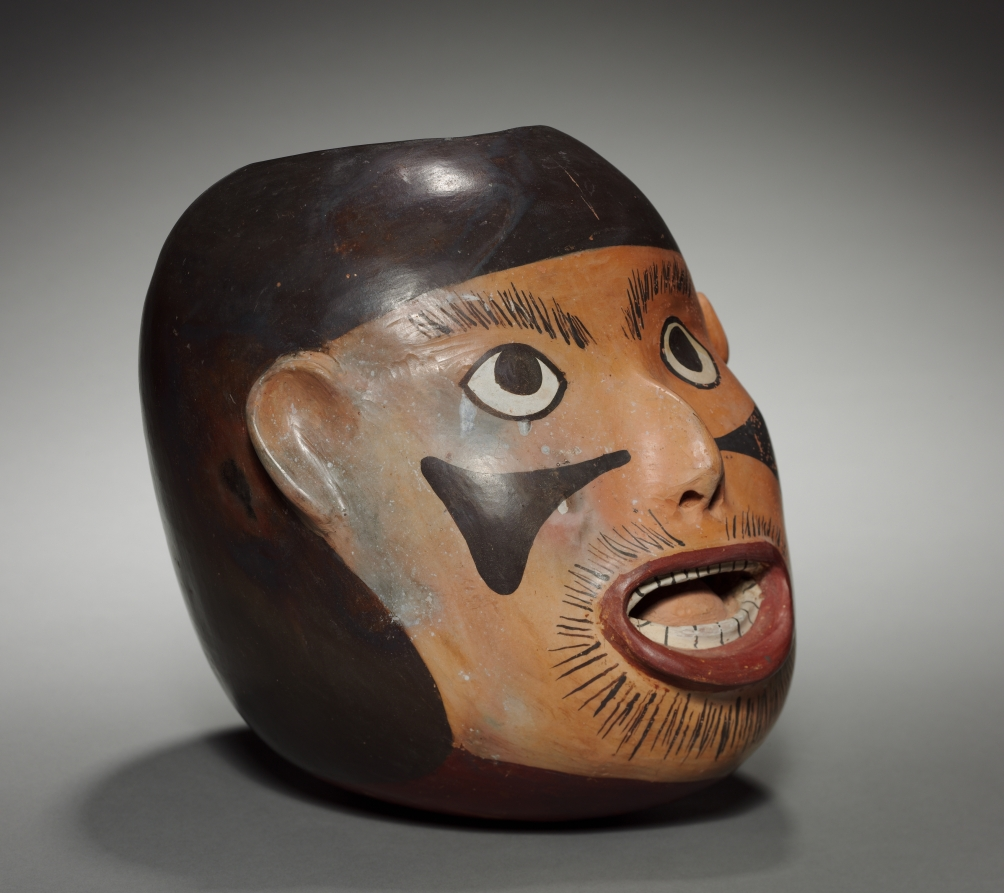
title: Severed Head Effigy Vessel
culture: Peru, South Coast, Nasca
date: c. 100–350 CE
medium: earthenware with colored slips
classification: Ceramic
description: The Nasca people were organized politically into small, competing chiefdoms, and warfare was common. This vessel represents a freshly severed human head (probably that of a captured and sacrificed prisoner) with staring eyes, gaping mouth, and blood-red underside. Modeling of the mouth cavity, tongue, and teeth lends the image a startling realism. Human sacrifice by decapitation was a central element of Nasca religion, essential to agricultural fertility. Severed heads were emptied and dried, then pierced through the forehead and suspended from a thick cord. Such preserved heads have been recovered from offering deposits and from tombs, where they were buried with their captors.